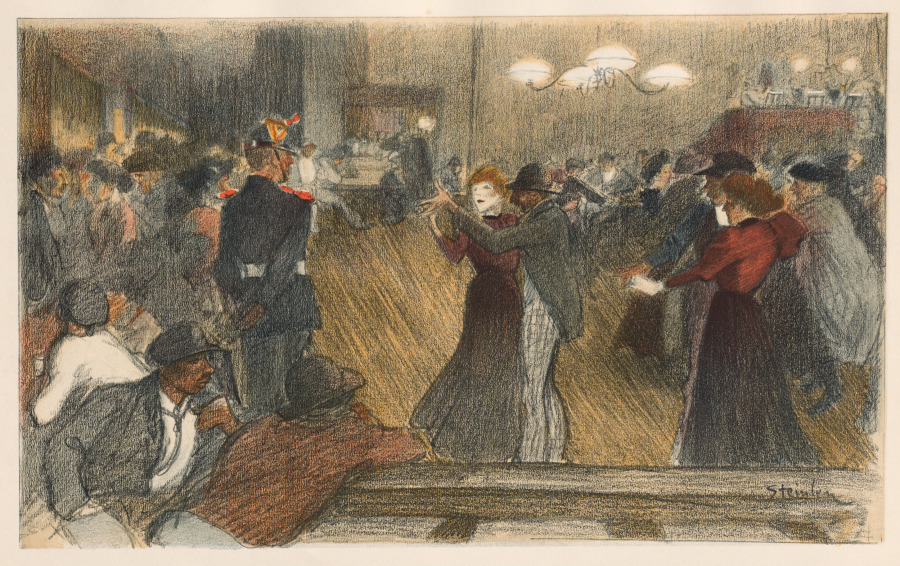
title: Bal de Barrière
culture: France, Paris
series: L'Estampe Moderne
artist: Théophile Alexandre Steinlen (Swiss, 1859–1923)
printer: Imprimerie Champenois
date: 1898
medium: Color lithograph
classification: Bound Volume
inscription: In plate: lower right corner of image:Steinlen; upper right corner of sheet: blindstamp of l'Estampe Moderne (Lugt 2790)